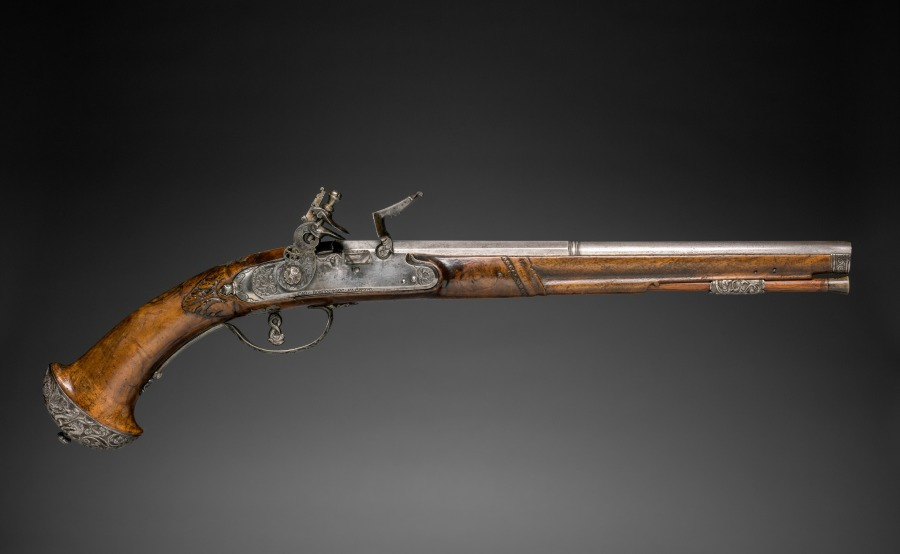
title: Flintlock Pistol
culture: Italy, Brescia, late 17th century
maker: Gio Borgognone (Italian)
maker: Lazarino Cominazzo (Italian)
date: c. 1690–1700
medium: steel, chiseled steel with walnut stock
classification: Arms and Armor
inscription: barrel signed: Lazarino Cominazzo; lockplates signed: Gio Borgognone in Bresia